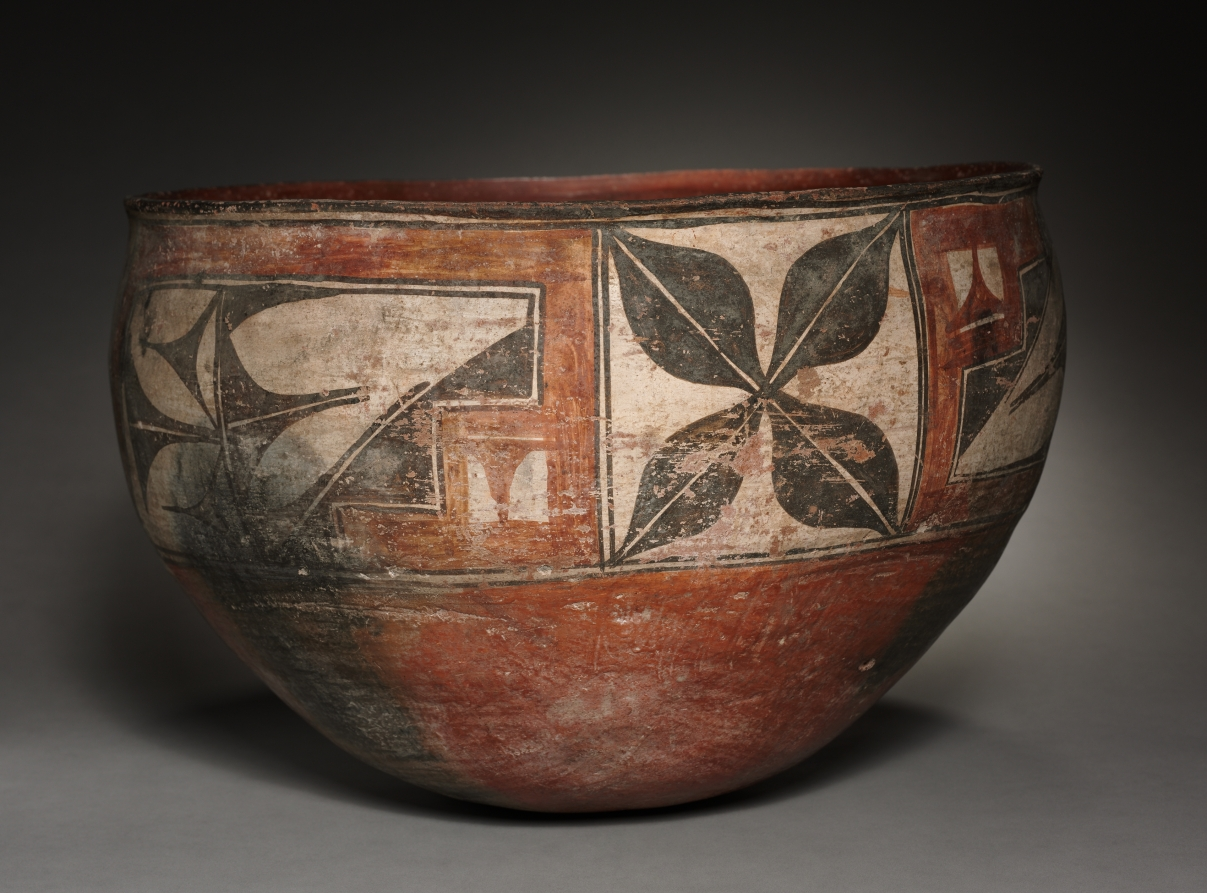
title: Dough Bowl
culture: Southwest,Pueblo, Zia, Post-Contact Period,19th century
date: 1890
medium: ceramic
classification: Ceramic